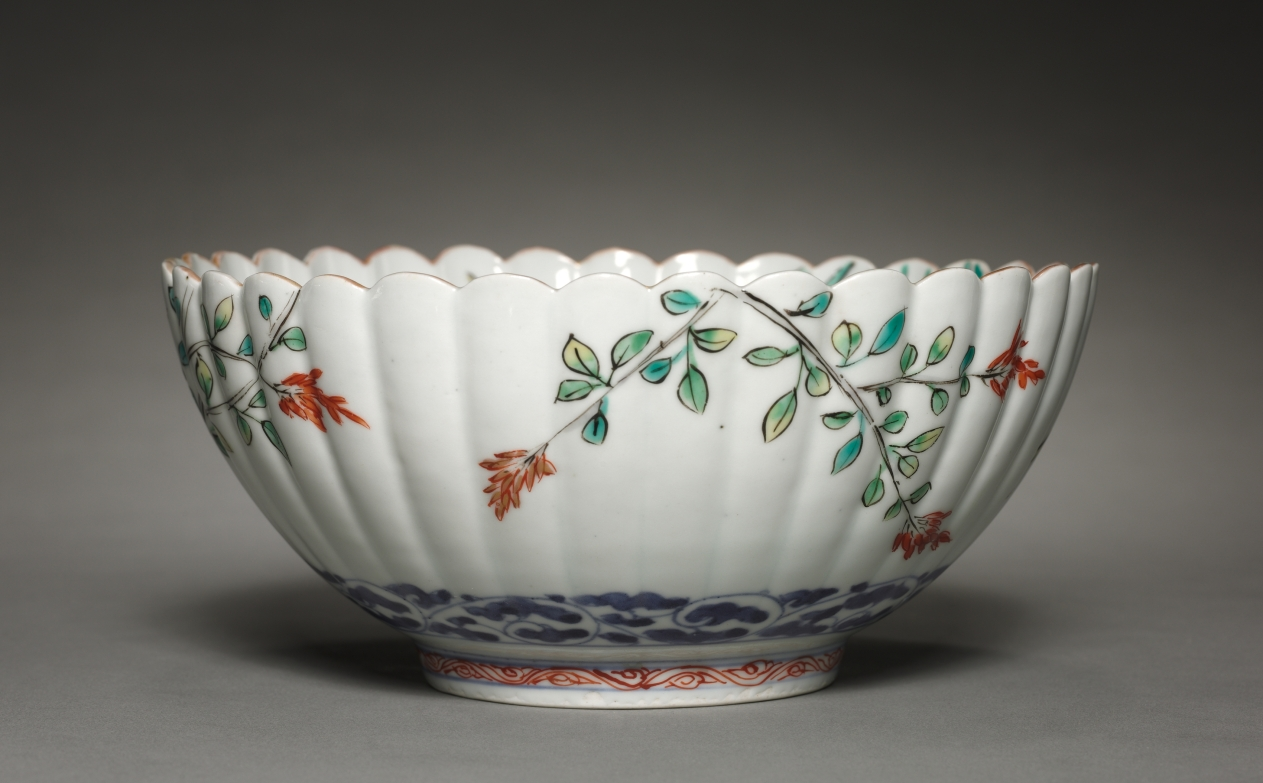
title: Fluted Bowl with Dragon, Butterfly, and Flowers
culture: Japan, Edo period (1615–1868)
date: early 1700s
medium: Porcelain with underglaze blue and overglaze color enamels and gold (Hizen ware, Kakiemon type)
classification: Ceramic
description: A dragon encircled by sprays of flowers and a butterfly enliven the interior of this fluted bowl. The exterior has similar decoration, with touches of gold on some petals. The flutes enhance both the visual and tactile experience; their tapered forms draw the eye from the edges inward and provide ridges for the hands.